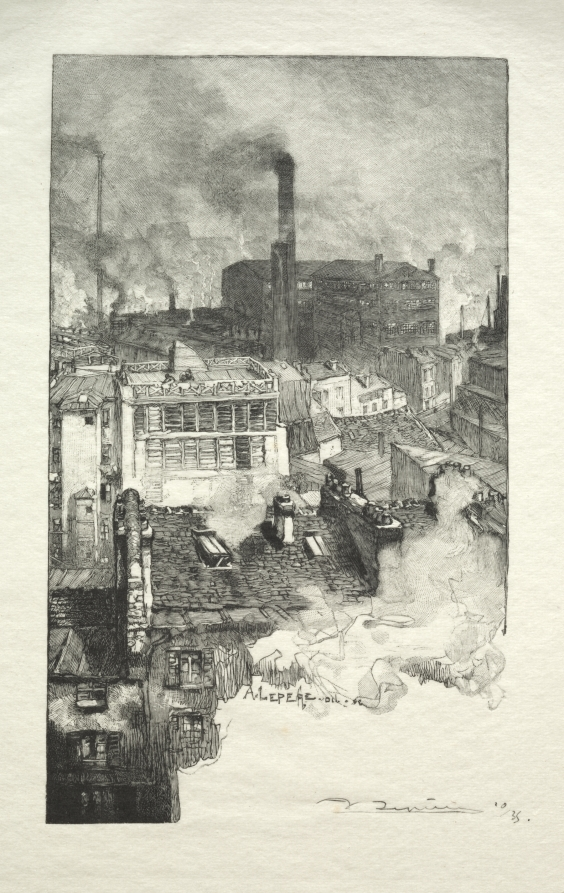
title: Quartier des Gobelins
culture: France, 19th century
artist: Auguste Louis Lepère (French, 1849–1918)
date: 1889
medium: wood engraving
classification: Print